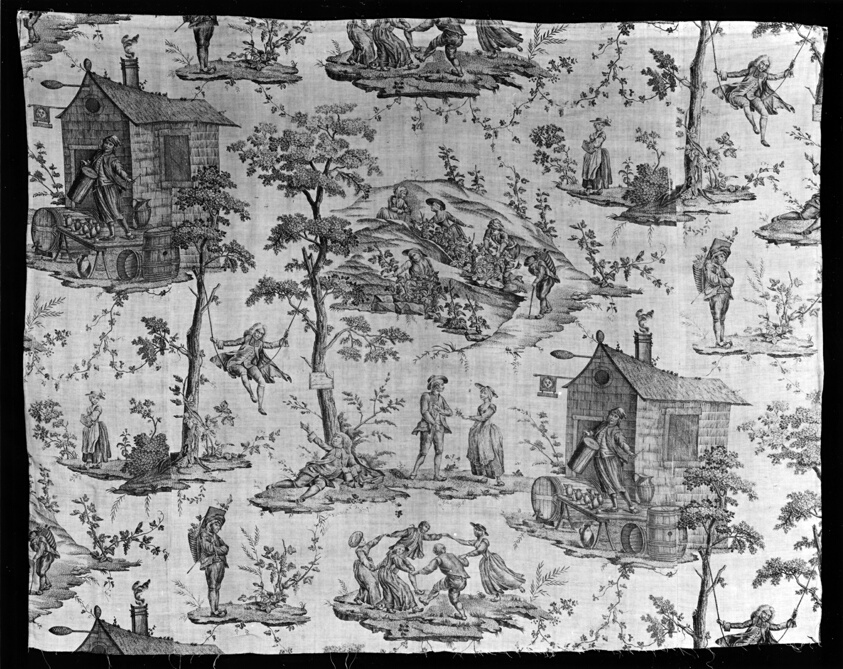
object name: Textile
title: Les Vendages (Furnishing Fabric)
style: jouy-en-Josas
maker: Manufactured by Christophe-Philippe Oberkampf (naturalized French, 1738-1815), Oberkampf Manufactory (French, 1760-1843); Jouy-en-Josas, France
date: 1785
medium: Cotton, plain weave; copperplate printed; backed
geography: Jouy-en-Josas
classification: textile; weaving - printed; furnishing textile